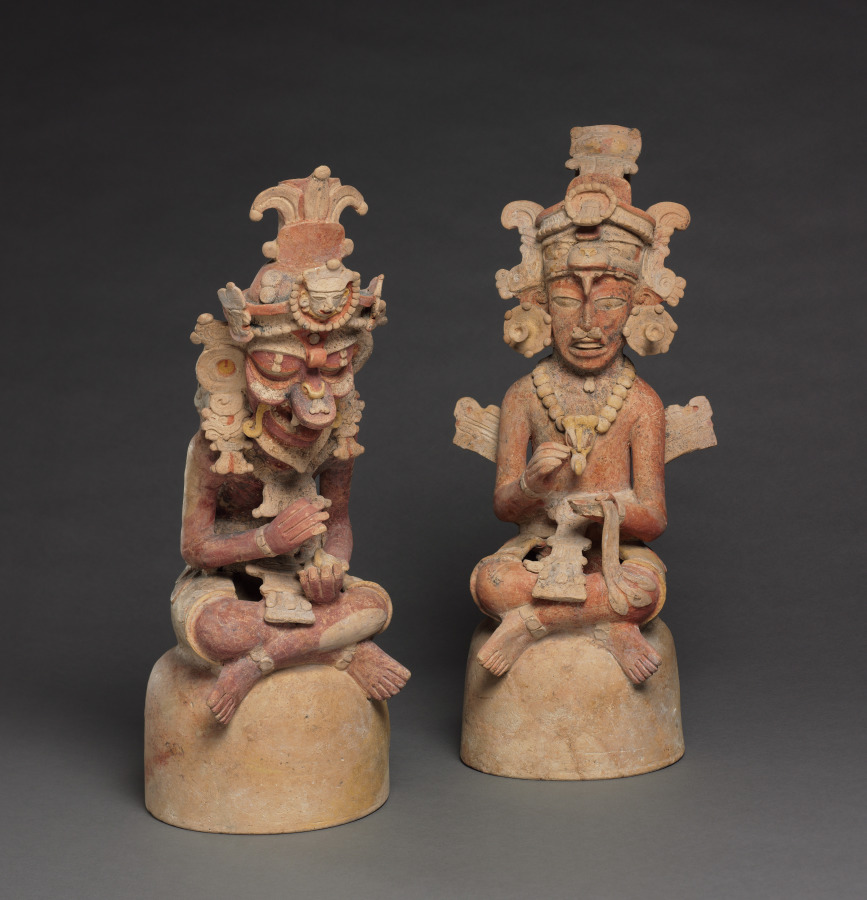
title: Two Artisans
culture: Guatemala, Petén region, Maya style (250-900), Maya style (250-900)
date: 250–600 CE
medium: earthenware with colored slips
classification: Sculpture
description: These figures represent the supernatural patrons of the visual arts and writing: the brothers Hun Batz and Hun Chuen ("One Monkey" and "One Artisan"). The two were refined artists but also bullies who tormented their younger brothers, who took revenge by transforming their elders into monkeys. Many Maya representations of the painter-scribes immortalize this fate by depicting the pair with both simian and human features, as here. The brothers are shown engaged in artistic or scribal pursuits. Sitting on high-domed bases that may have served as the lids of incense or offering bowls, each apparently once grasped a tool in his upper hand—for instance, a paint brush or a stylus for writing. In the lower hand, one cradles a small mask and the other, a piece of bark that likely refers to the beaten bark from which the Maya made books.